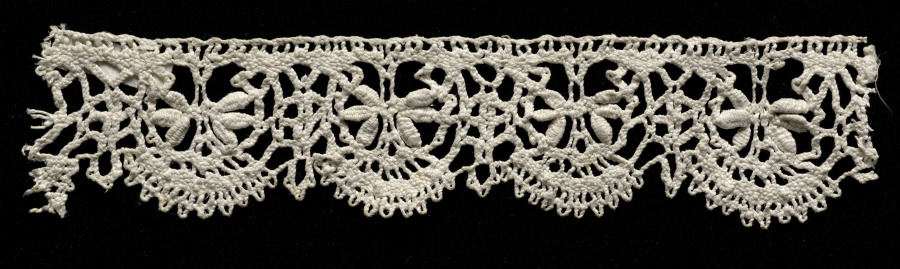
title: Lace Edging of Bell Points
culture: Italy, Genoa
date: 1600s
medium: Bobbin lace (rose lace)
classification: Lace